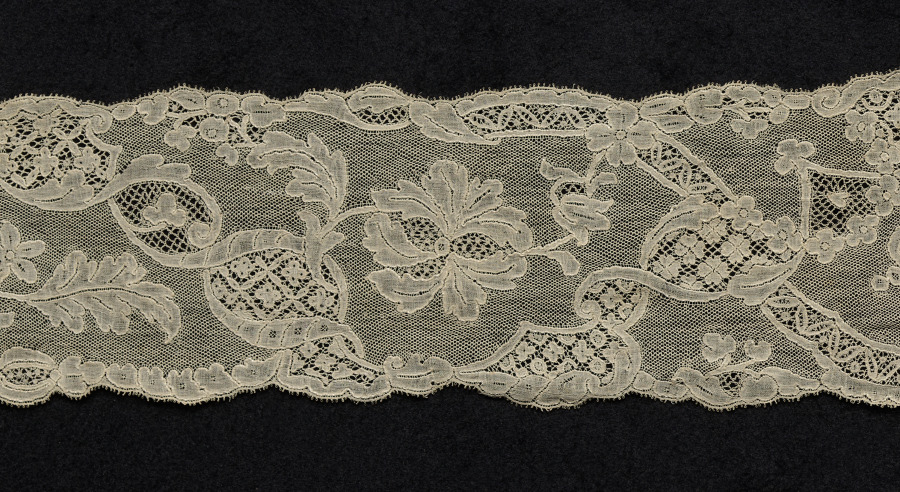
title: Lace Lappet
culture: Belgium, Mechelen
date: 1700s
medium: Linen: bobbin lace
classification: Lace